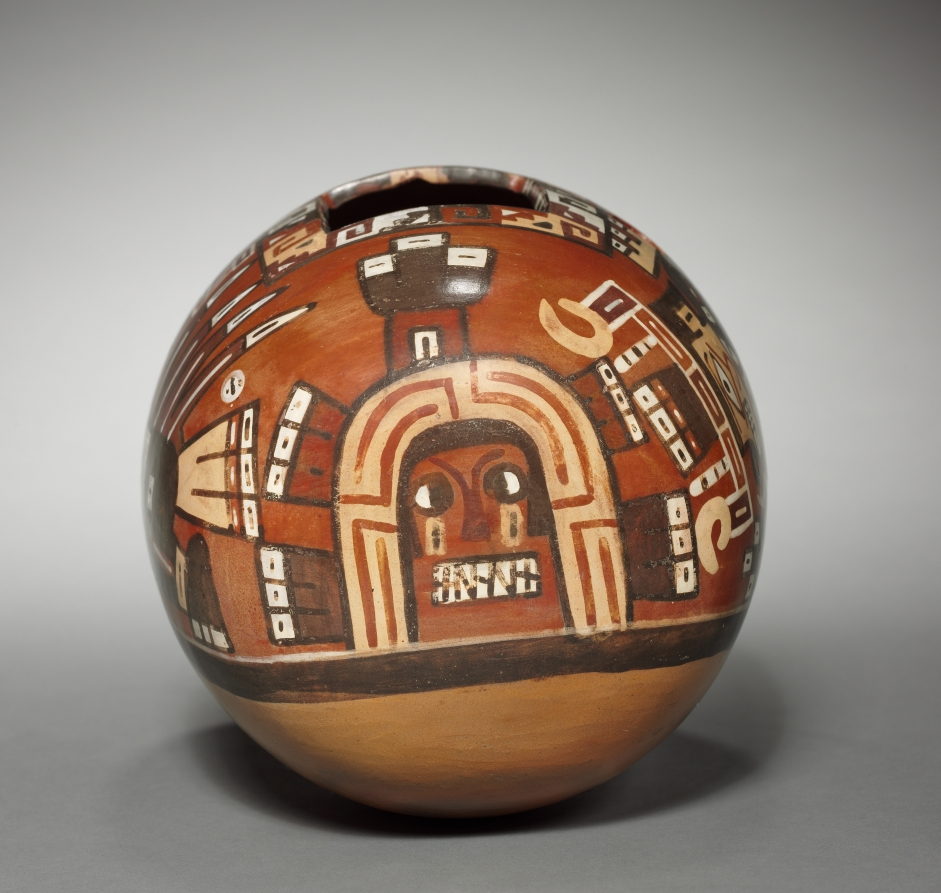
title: Container with Deity Head and Winged Attendants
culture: Central Andes, central coast, coastal Wari style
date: 600–1000 (Thermoluminescence date, 730–1190)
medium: ceramic and slip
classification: Ceramic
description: The head of the staff deity, the most important supernatural being depicted in Wari art, appears on the ends of this container, the function of which is mysterious. The sides feature two of the deity's attendants, each with a wing and N-shaped fangs drawn from the animal world. One of these creatures carries a staff, a supreme symbol of divine authority and power.